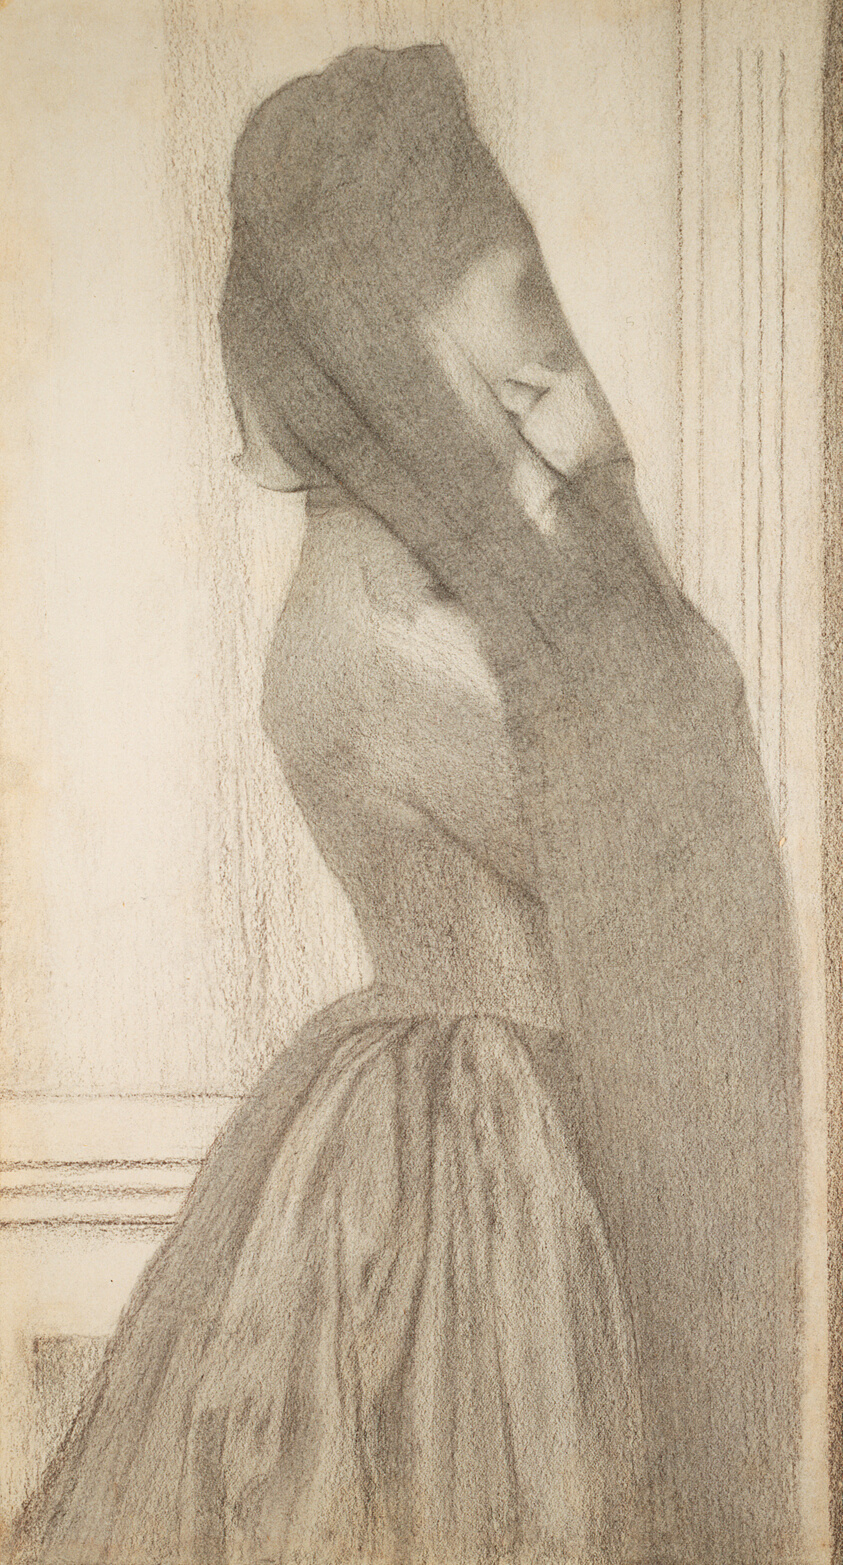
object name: Drawing and Watercolor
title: The Veil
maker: Fernand Khnopff (Belgian, 1858-1921)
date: c. 1887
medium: Charcoal and graphite with stumping on ivory wove paper, laid down on wood pulp board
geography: Belgium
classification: charcoal; drawings (visual works); prints and drawing